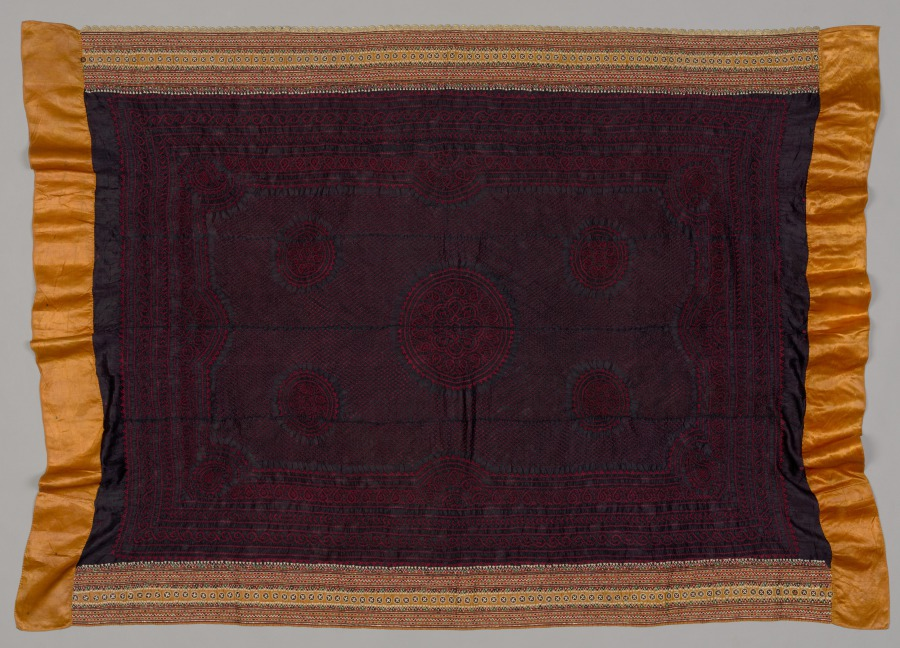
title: Odhani or Bandhani (Veil worn over Head)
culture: Western India, Gujarat, Kachchh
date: early 1900s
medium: silk, tie-dyed (but not ironed flat) and embroidered with polychrome silk and flat strips of silver plaited with silk thread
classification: Textile